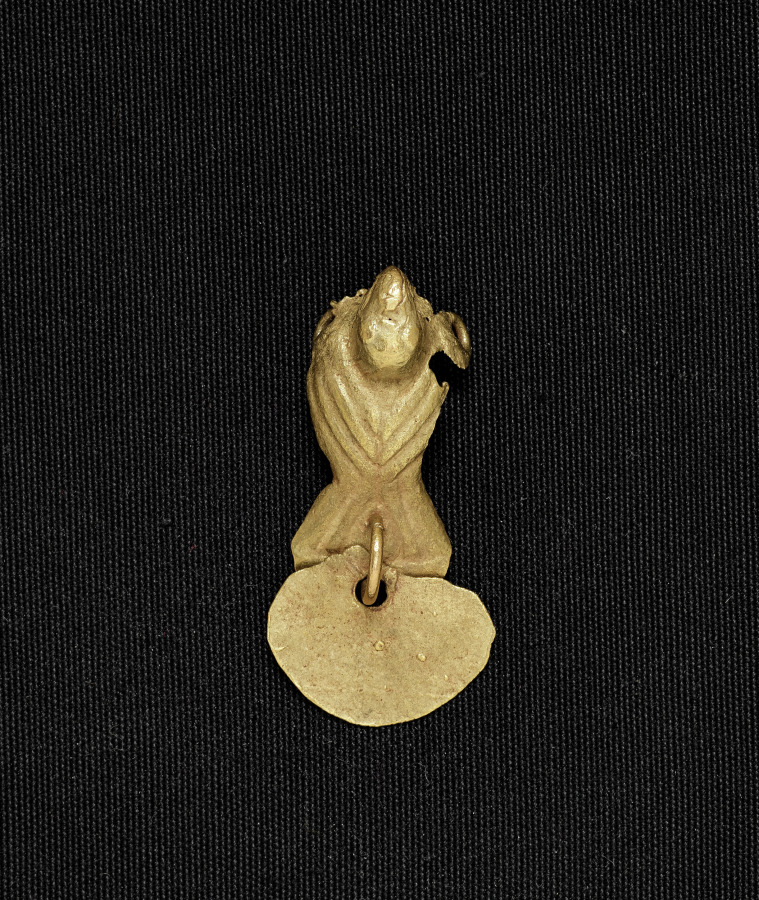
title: Bird Bead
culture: Colombia, Muisca style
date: c. 900–1550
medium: cast gold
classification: Jewelry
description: Muisca metalwork divides into two categories: ornaments to be worn, such as these, and offering figurines, in the case to the right. The elaborate bird pendant features delicate herringbone moldings, openwork patterns, and wing details-all part of the wax model from which the pendant was cast (see nearby computer animation). The dangles were attached after casting.